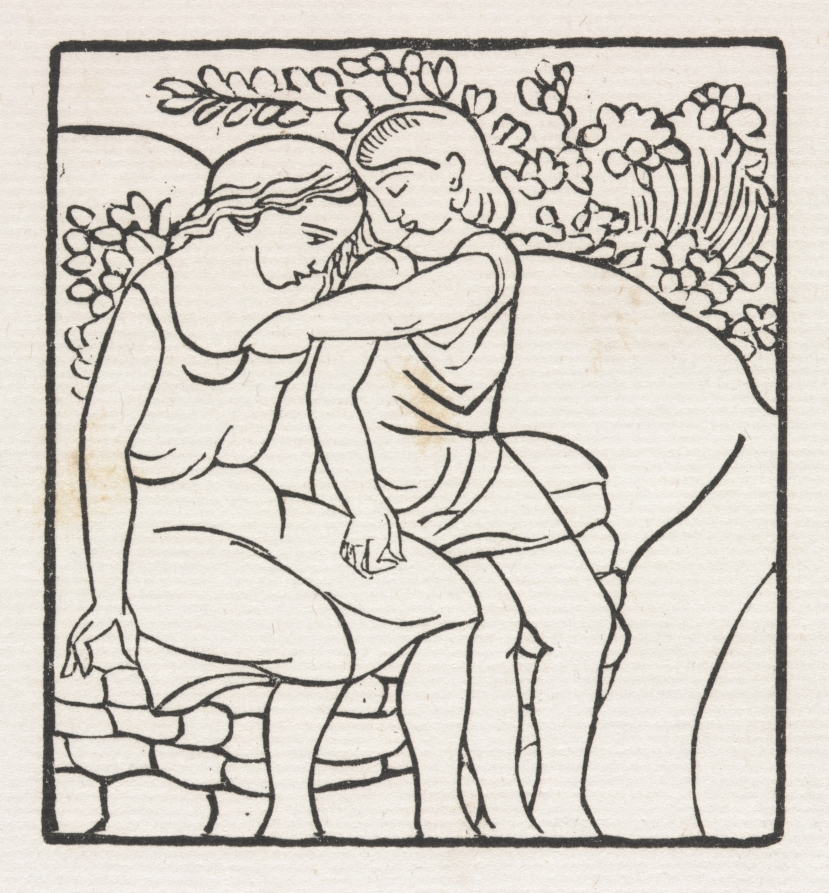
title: Daphnis and Chloe: Daphnis and Chloe at Play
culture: France, 19th century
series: similiar to Daphnis and Chloe, Pantheon Books Inc., 1949 p. 131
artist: Aristide Maillol (French, 1861–1944)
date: 1937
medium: woodcut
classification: Print